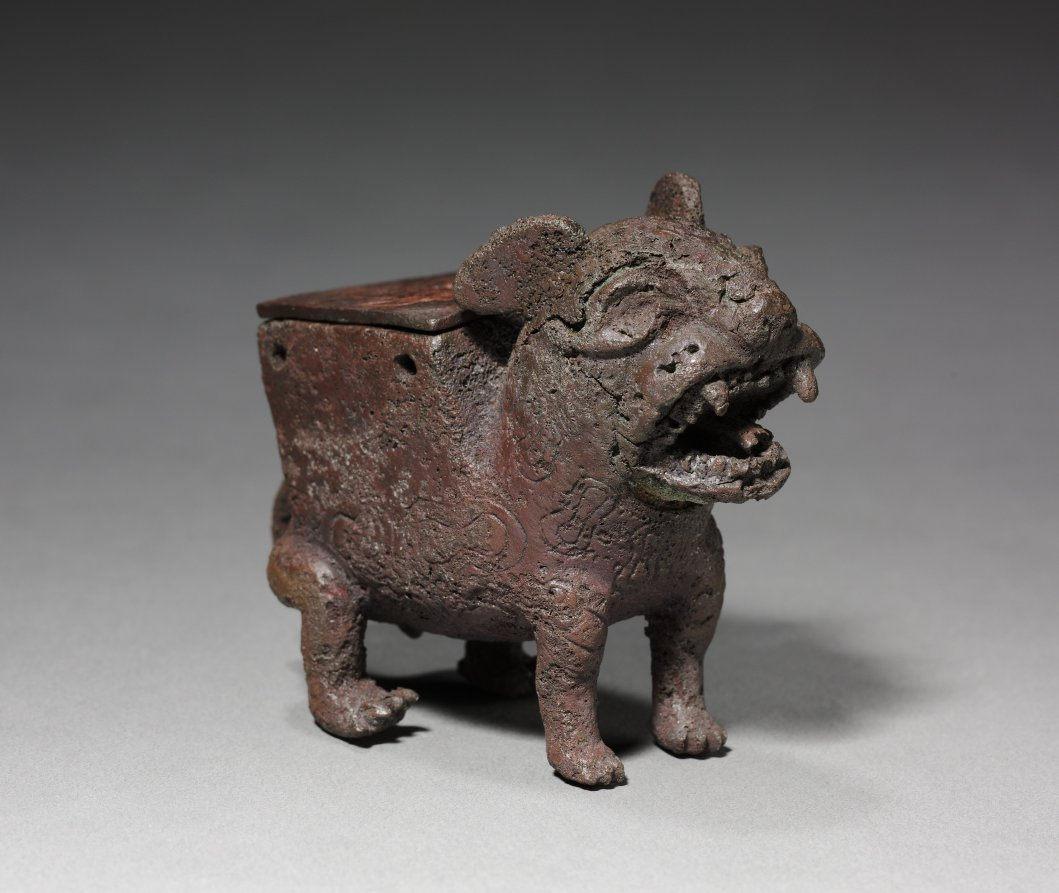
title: Male Feline-Shaped Container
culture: Peru, North Coast, Moche style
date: 50–800 CE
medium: cast copper alloy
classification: Sculpture